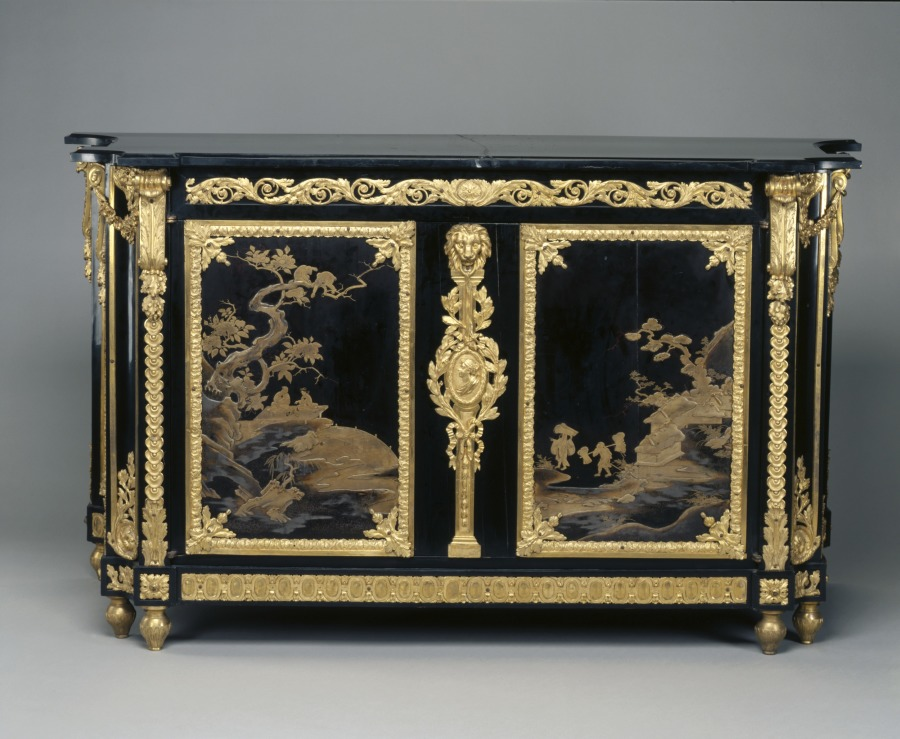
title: Chest of Drawers (Commode)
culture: France, Paris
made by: René Dubois (French, 1737–1798)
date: c. 1765– 1770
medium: ebony veneer with Japanese lacquer panels, gilt bronze mounts, and marble top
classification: Furniture and woodwork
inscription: signed on top front corners: I. Dubois.